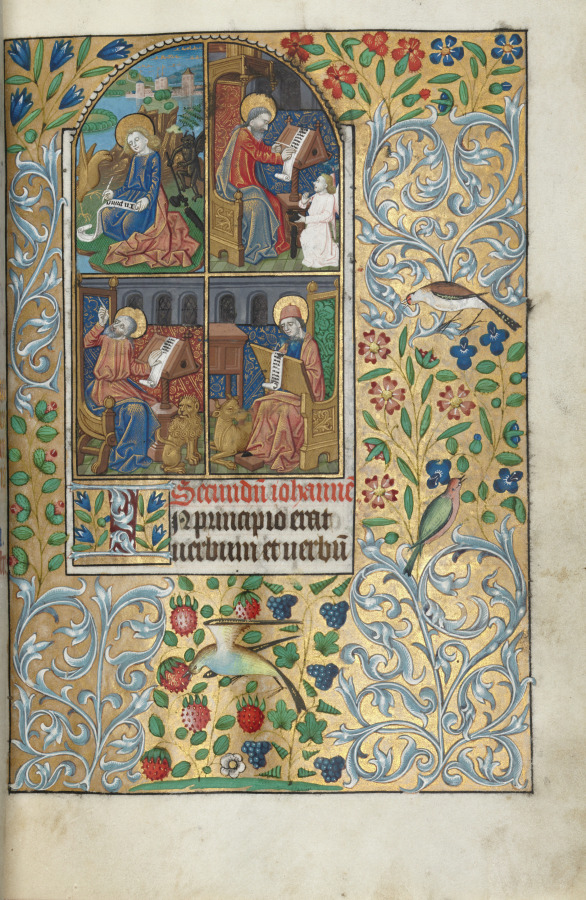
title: Book of Hours (Use of Rouen)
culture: France, Rouen, 15th century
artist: Master of the Geneva Latini (French, active Rouen, 1460–80)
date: c. 1470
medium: ink, tempera, and gold on vellum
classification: Bound Volume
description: In the late 1400s and early 1500s, Rouen, France, was an established and important center of book production. The city’s cathedral had a wealthy chapter that spent large sums of money to commission books and to maintain its extensive library. The stationers (sellers of writing supplies) and booksellers would have likely been concentrated in or near the cathedral precinct. This artist, named after a manuscript now in Geneva, Switzerland, was Rouen’s principal illuminator during the second half of the 1400s. The structure and artistic design are typical for manuscripts of the time.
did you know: Books of hours were often produced as luxury objects in order to reflect the owner’s status, wealth, and taste.